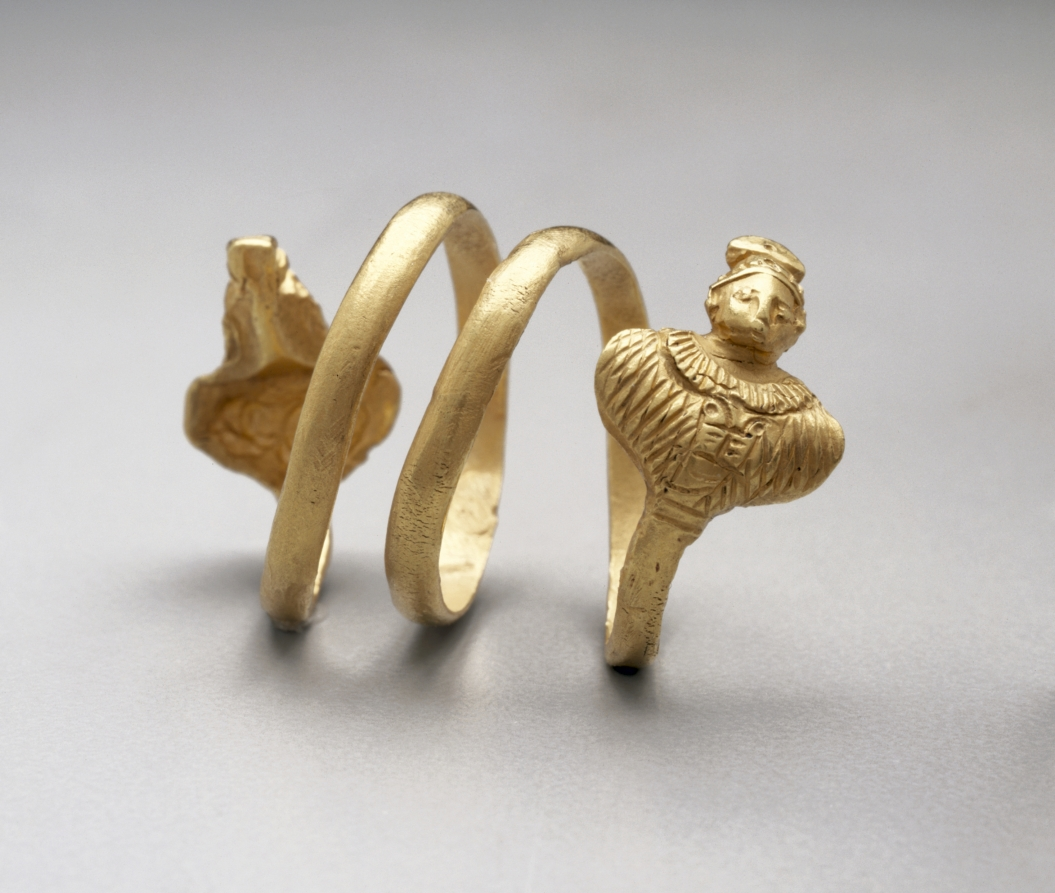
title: Spiral Ring with Isis and Serapis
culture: Greece or Italy, Rome (?)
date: 1–100 CE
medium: gold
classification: Jewelry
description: This spiral gold ring is decorated with tiny busts on either terminal, representing the gods Isis and Serapis. Both gods are shown from the waist up, with wide shoulders and small heads that create a shape reminiscent of a cobra snake.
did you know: The two ends of this spiral ring terminate in humanlike protomes.